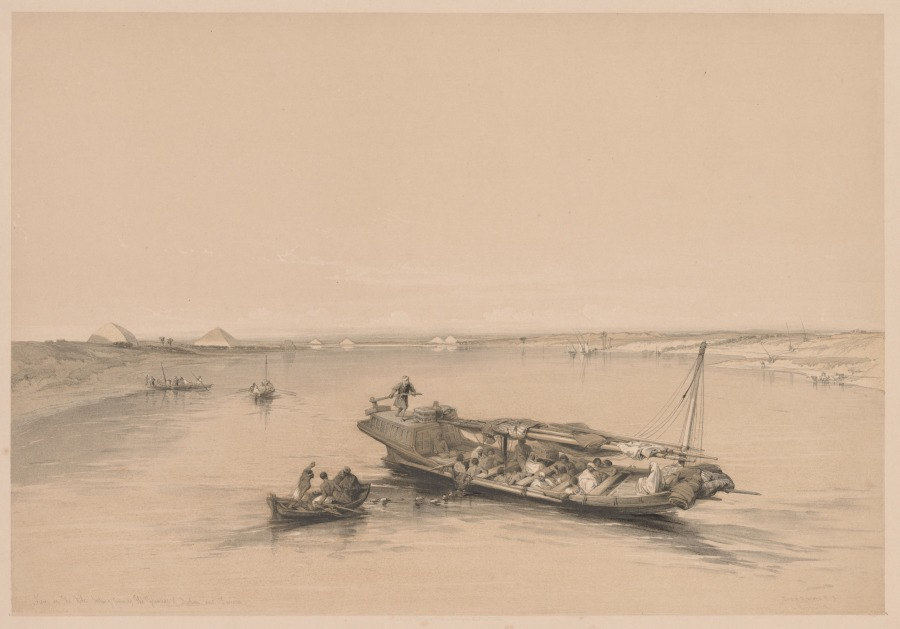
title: Egypt and Nubia: Volume I - No. 4, Slave Boats on the Nile, View Looking Towards the Pyramids of Dashour and Saccara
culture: England, 19th century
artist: Louis Haghe (British, 1806–1885)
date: 1838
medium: color lithograph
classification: Print